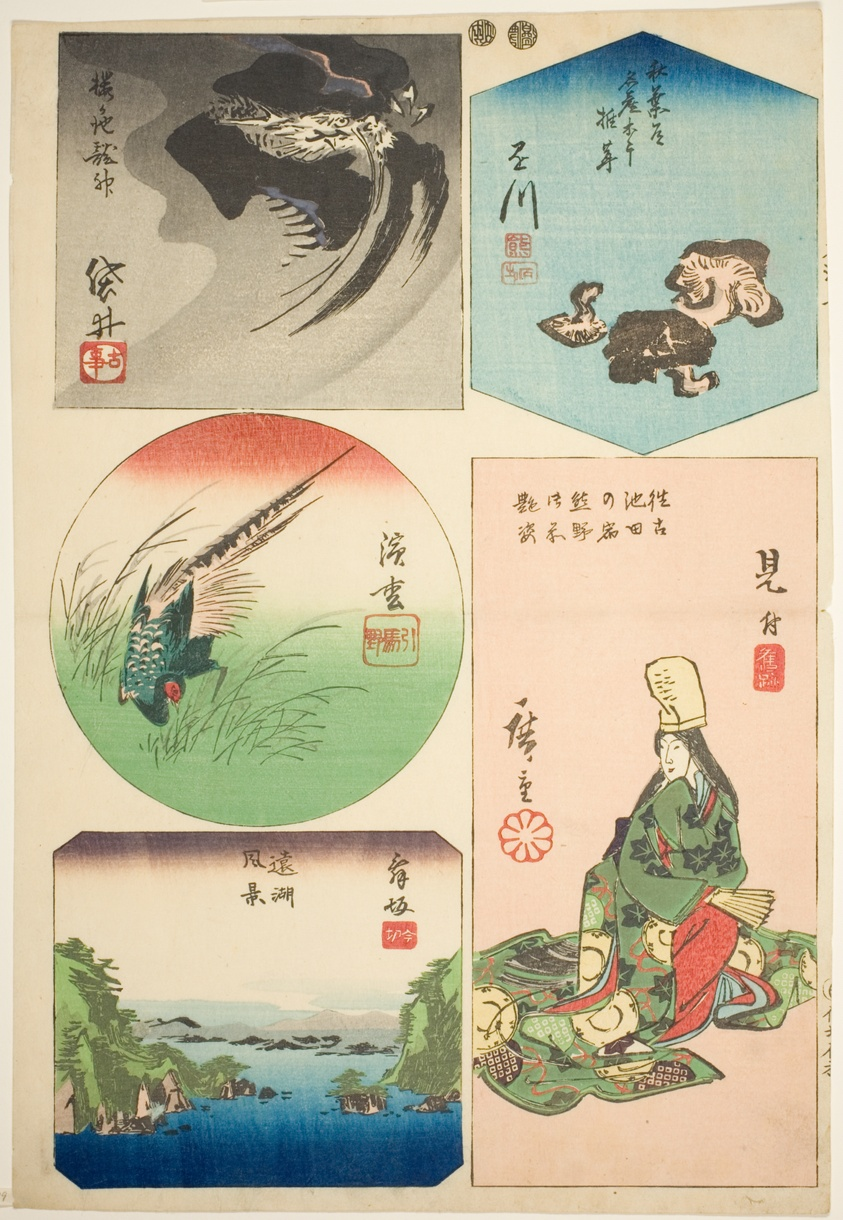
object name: Print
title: Kakegawa, Fukuroi, Mitsuke, Hamamatsu, and Maisaka, no. 7 from the series "Cutout Pictures of the Tokaido Road (Tokaido harimaze zue)"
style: Japanese (culture or style)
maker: Utagawa Hiroshige 歌川 広重; Japanese, 1797-1858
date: c. 1848/52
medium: Color woodblock print; section of harimaze sheet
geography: Japan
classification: woodblock print; print; asian art